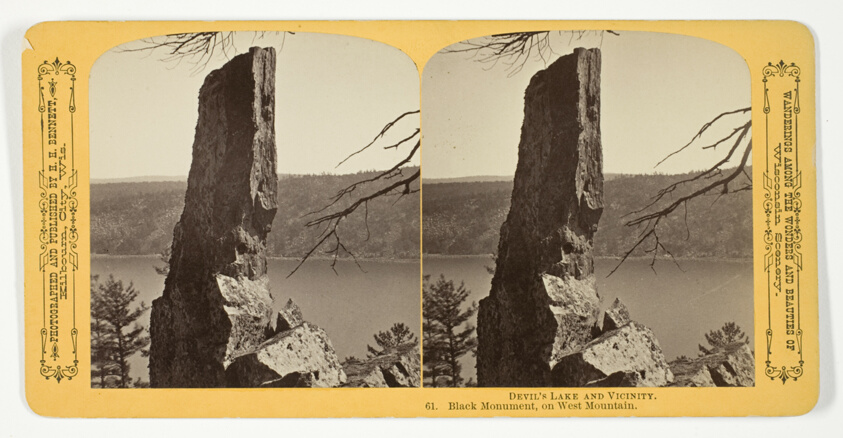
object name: Photograph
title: Black Monument, on West Mountain, No. 61 from the series "Devil's Lake and Vicinity"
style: 19th century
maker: Henry Hamilton Bennett (American, born Canada, 1843-1908)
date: 1870/1908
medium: Albumen print, stereo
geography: Wisconsin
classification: photography; photograph; albumen silver print; stereograph (albumen)